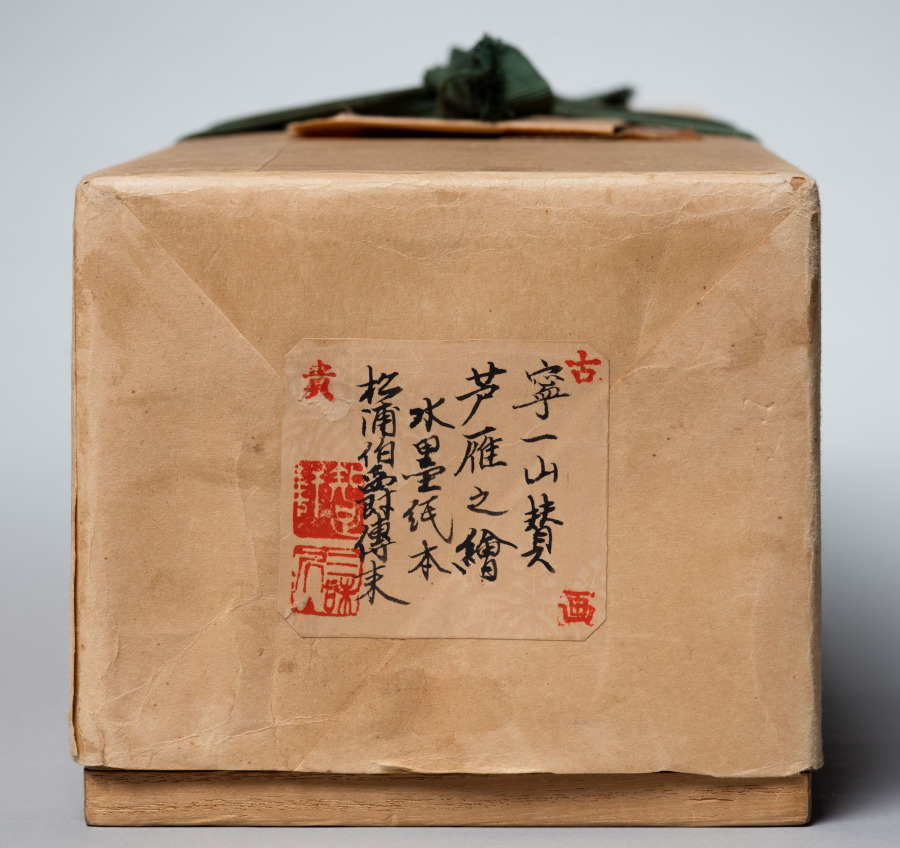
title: Reeds and Geese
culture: Japan, Kamakura period (1185–1333)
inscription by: Yishan Yining [Issan Ichinei] (Chinese, 1247–1317)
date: 1314–17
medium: hanging scroll; ink on paper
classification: Painting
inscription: signed: Issan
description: Reeds and geese has been a common pairing in Chinese literary and visual culture for many centuries. This painting presents the contribution of a Japanese amateur painter, almost certainly a Zen Buddhist monk, to Japan’s fledgling efforts to add the theme to its own cultural vocabulary in the early 1300s. As was customary at the time in Japan, the painter did not sign or seal his work; the inscription, a poem added to the painting by the eminent émigré monk Yishan Yining, along with his signature and seal, was of far greater cultural value. Today, the modestly sized painting has tremendous significance as one of the earliest surviving examples of Japanese ink paintings with reeds and geese.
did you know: Tokyo National Museum owns a copy of this painting made by Kano Gyokusen (1796–1864) when he was 14 years old.